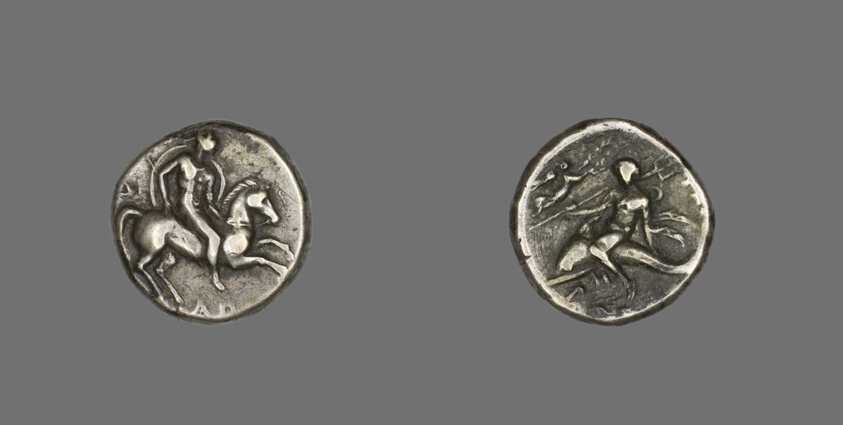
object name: Coin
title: Stater (Coin) Depicting Horseman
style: greek, ancient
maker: Greek, minted in Tarentum, Calabria, Italy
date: 272-235 BCE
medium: Silver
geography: Taranto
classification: coin; ancient art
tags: mythological figures, horseback riding, dolphins, horses